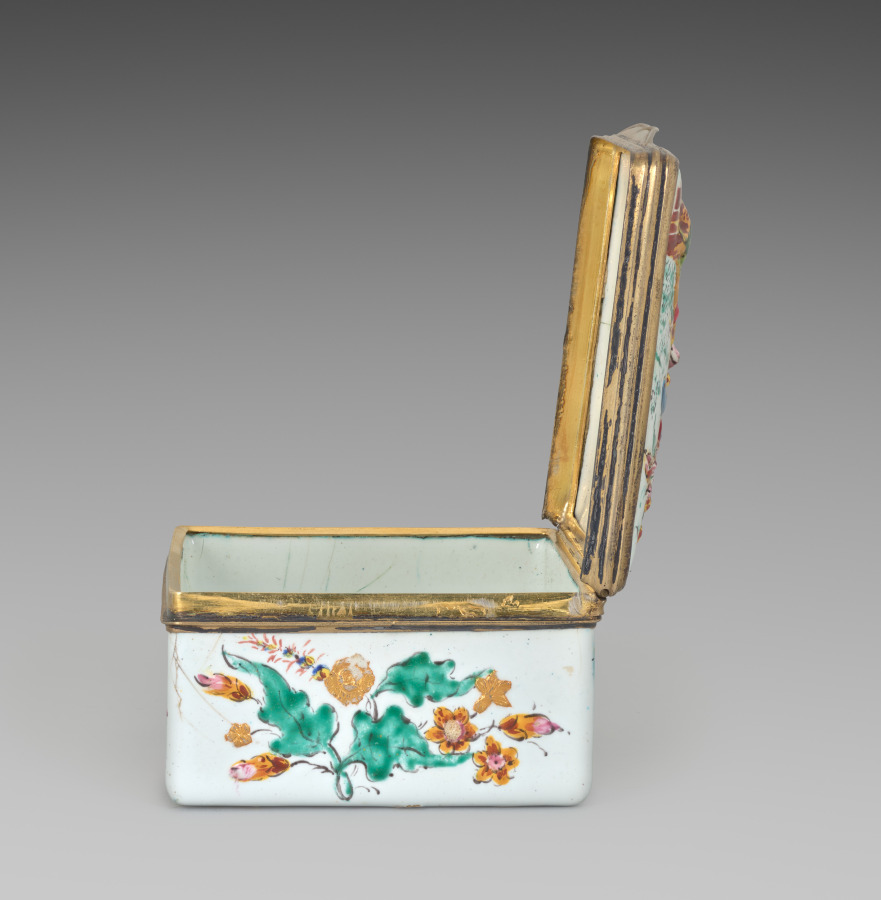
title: Box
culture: France, 18th century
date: 1749–50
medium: silver gilt and enamel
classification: Enamel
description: Chinoiserie in 18th-century France incorporated imitations of East Asian motifs, designs, and ornaments into European art. These imitations were often distorted by the European imagination and were not accurate representations of the cultures from which they drew inspiration. Elements of chinoiserie in this box can be seen primarily on the lid where enormous, vibrantly colored flowers tower over two crouching figures and a grouping of buildings.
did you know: The flower petals on the box lid are raised, an effect produced by drops of transparent enamel placed on the box’s surface that imitates polished gemstones or pearls.